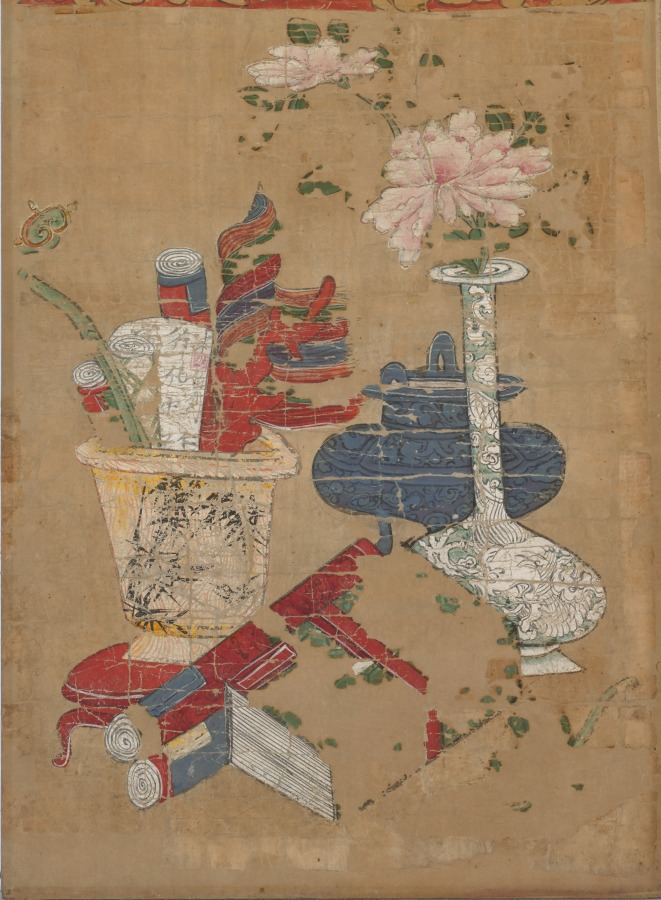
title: Buddhist Panel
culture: China or Korea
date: 1600s–1700s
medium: Hanging scroll; ink and color on paper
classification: Painting